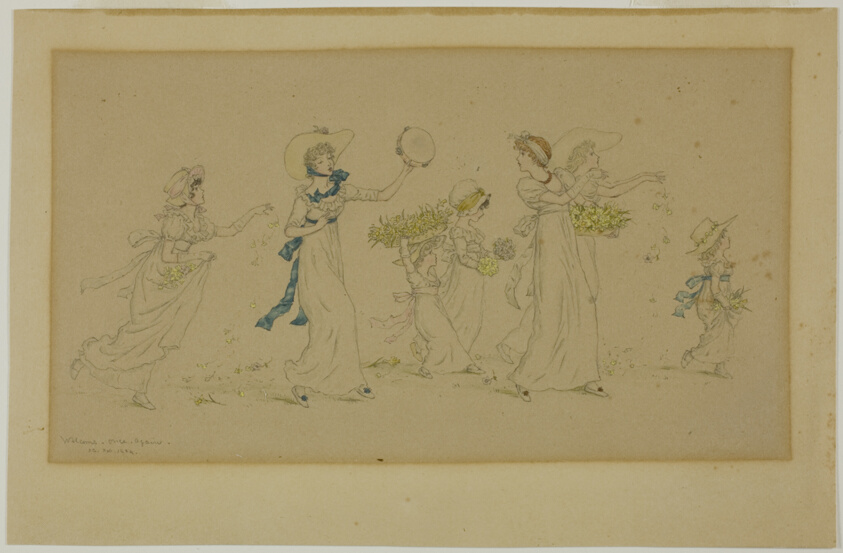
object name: Drawing and Watercolor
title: Welcome Once Again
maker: Kate Greenaway (English, 1846-1901)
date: 1884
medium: Graphite with watercolor on cream wove paper (discolored to tan)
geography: England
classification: graphite; drawings (visual works); prints and drawing